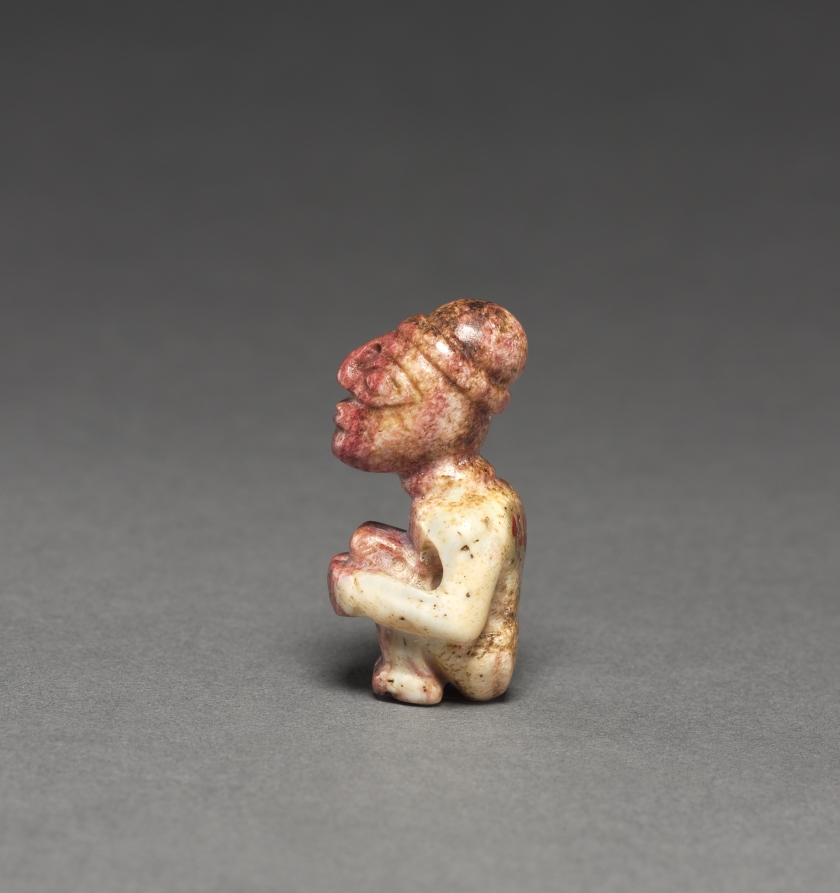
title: Seated Figurine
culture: Peru, Inca, 15th-16th century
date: c. 1400–1540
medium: stone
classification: Sculpture